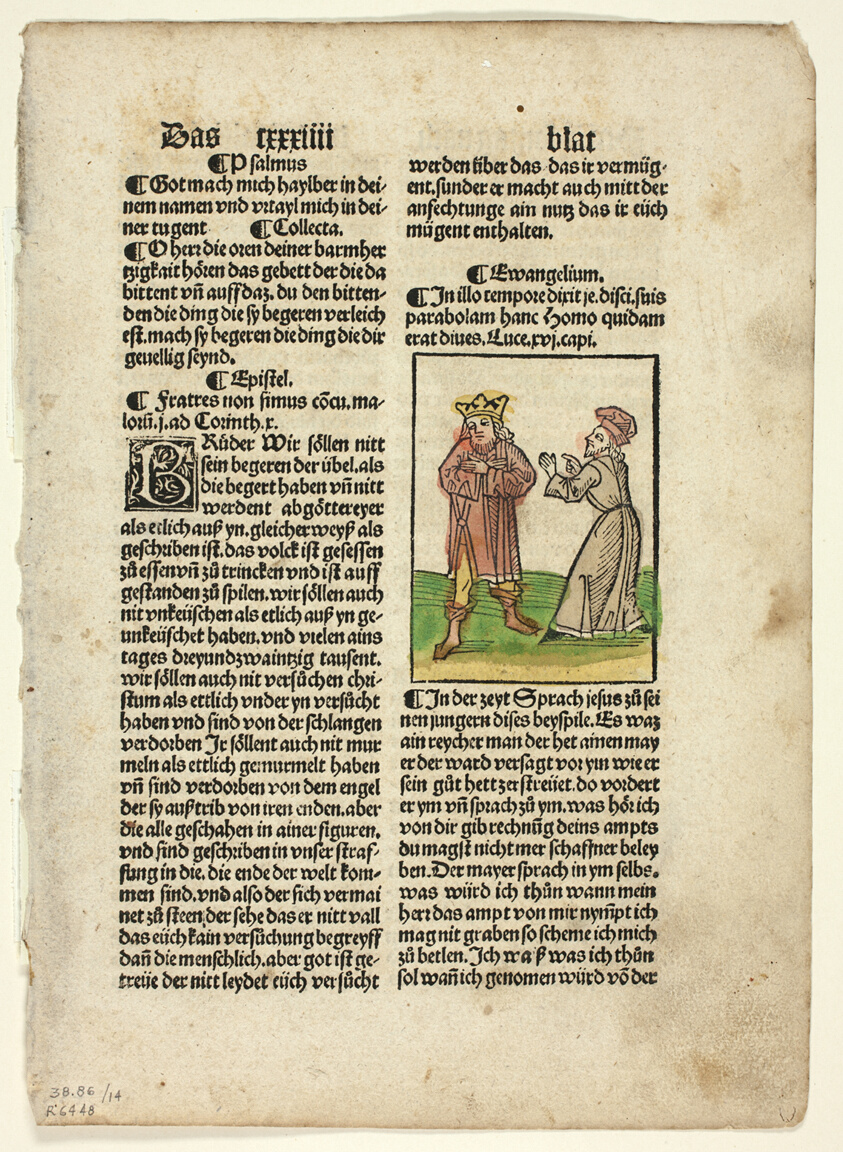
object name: Print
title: The Parable of the Unjust Steward from Plenarium, Plate 14 from Woodcuts from Books of the 15th Century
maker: Unknown Artist (Augsburg, 15th century); printed and published by Johann Schönsperger the Elder (German, c. 1455–1521); portfolio text by Wilhelm Ludwig Schreiber (German, 1855–1932)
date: 1497, portfolio assembled 1929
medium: Woodcut in black with hand-colored additions, and letterpress in black (recto and verso), on buff laid paper, tipped onto cream wove paper mat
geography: Germany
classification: woodcut; print; prints and drawing